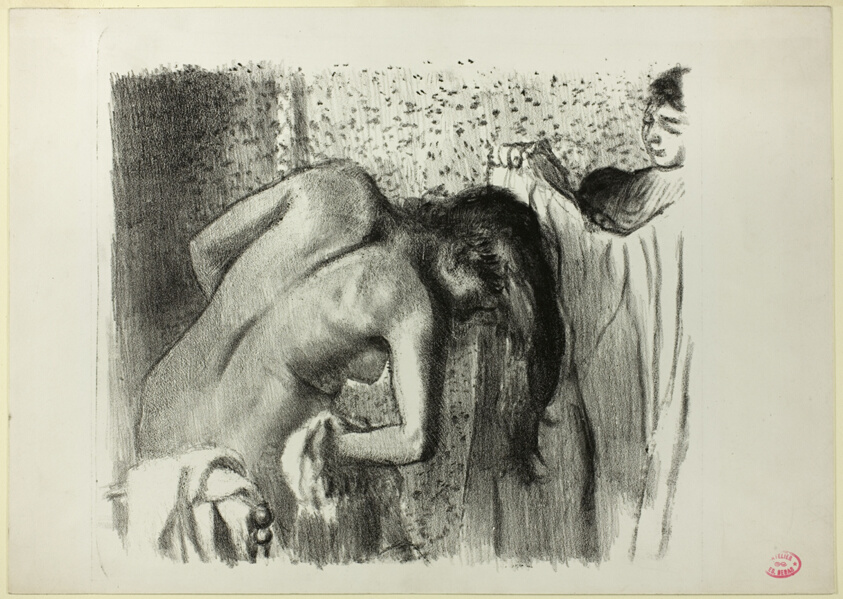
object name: Print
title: After the Bath (large version)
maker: Edgar Degas; French, 1834-1917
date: 1891–92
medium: Transfer lithograph in black on ivory wove plate paper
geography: France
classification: lithograph; print; prints and drawing; paper